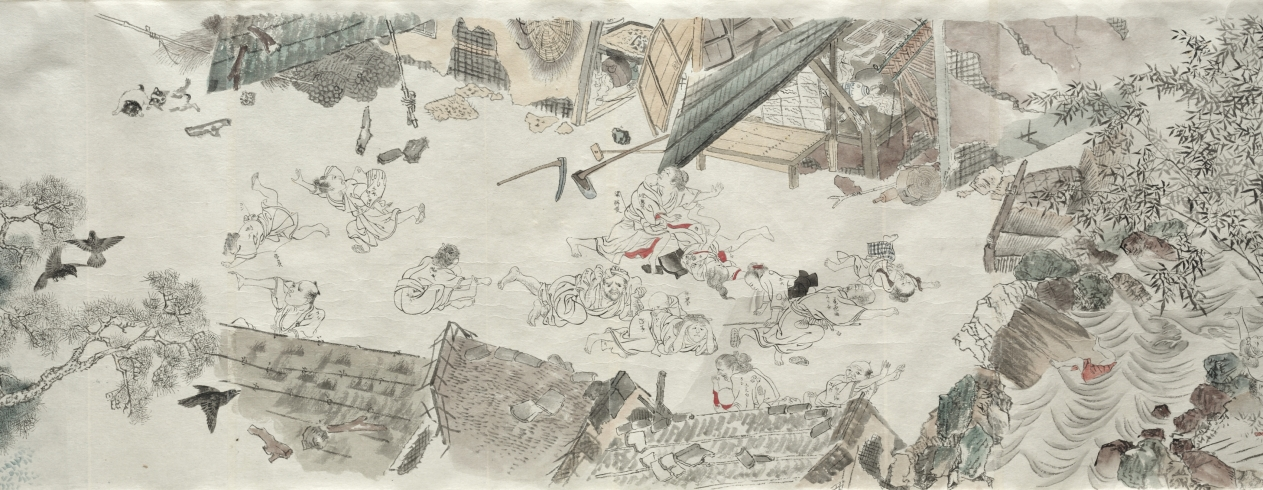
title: Sketch Copy of Natural Disasters, from the Seven Fortunes and Misfortunes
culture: Japan, Edo period (1615–1868) to Meiji period (1868–1912)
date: after 1773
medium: handscroll; ink and color on paper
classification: Painting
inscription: Signed: Gettcho; dated 1773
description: This unmounted handscroll is a copy of the first of a three-scroll set painted by Maruyama Ōkyo (1733–1795) for Buddhist monk Yujō (1723–1773). It depicts people's unfortunate encounters with forces of nature from wind to beasts. Ōkyo's realistic, contemporary imagery was meant to evoke a sense of recognition and empathy in viewers, shocking them into avoidance of possible punishments.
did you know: Notations that appear throughout the scroll indicate colors and other details of the original painting.